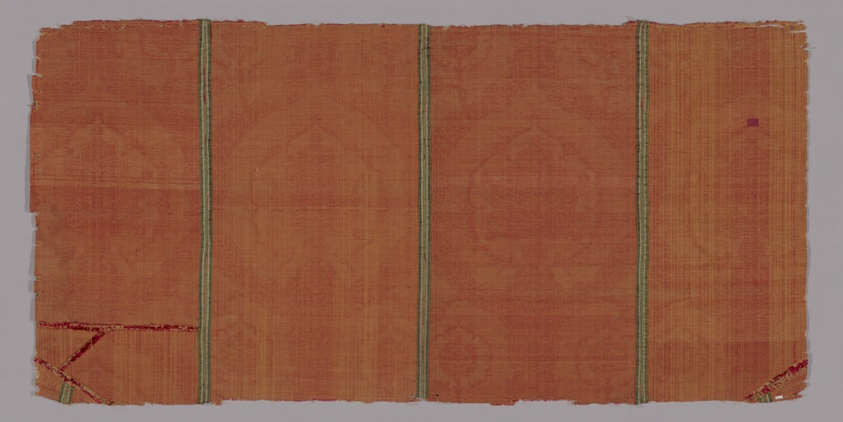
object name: Religious/Ritual Object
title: Altar Frontal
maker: Spain or Italy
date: 1480-1550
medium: Silk, warp-float faced 3:1 'Z' twill weave with supplementary discontinuous facing brocading wefts forming areas of weft loops (known as bouclé) tied by secondary binding warps in weft-float faced 3:1 twill interlacing and supplementary pile warps forming cut, pile on pile, voided velvet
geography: Spain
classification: textile; weaving - velvet; liturgical; ritual objects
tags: pomegranates